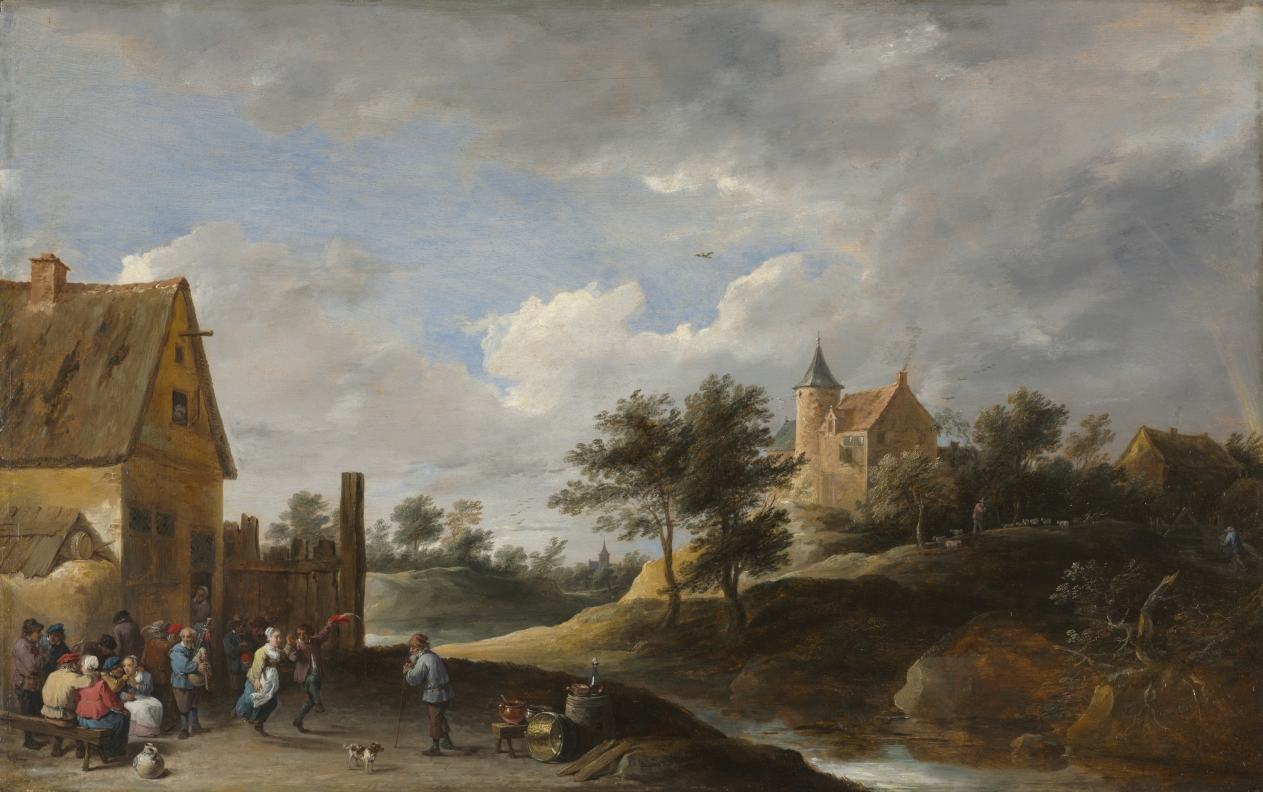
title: Landscape with Peasants Dancing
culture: Flanders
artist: David Teniers (Flemish, 1610–1690)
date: c. 1645–50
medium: oil on wood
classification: Painting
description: Before a rustic inn, a group of villagers converse, embrace, and dance to a bagpiper’s tune. Teniers was one of many Netherlandish artists whose paintings celebrate the joys of country life. These delicately painted works were created primarily for an elite urban audience nostalgic for a simpler existence.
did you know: This painting combines two of David Teniers's specialties: landscape and scenes of country life.